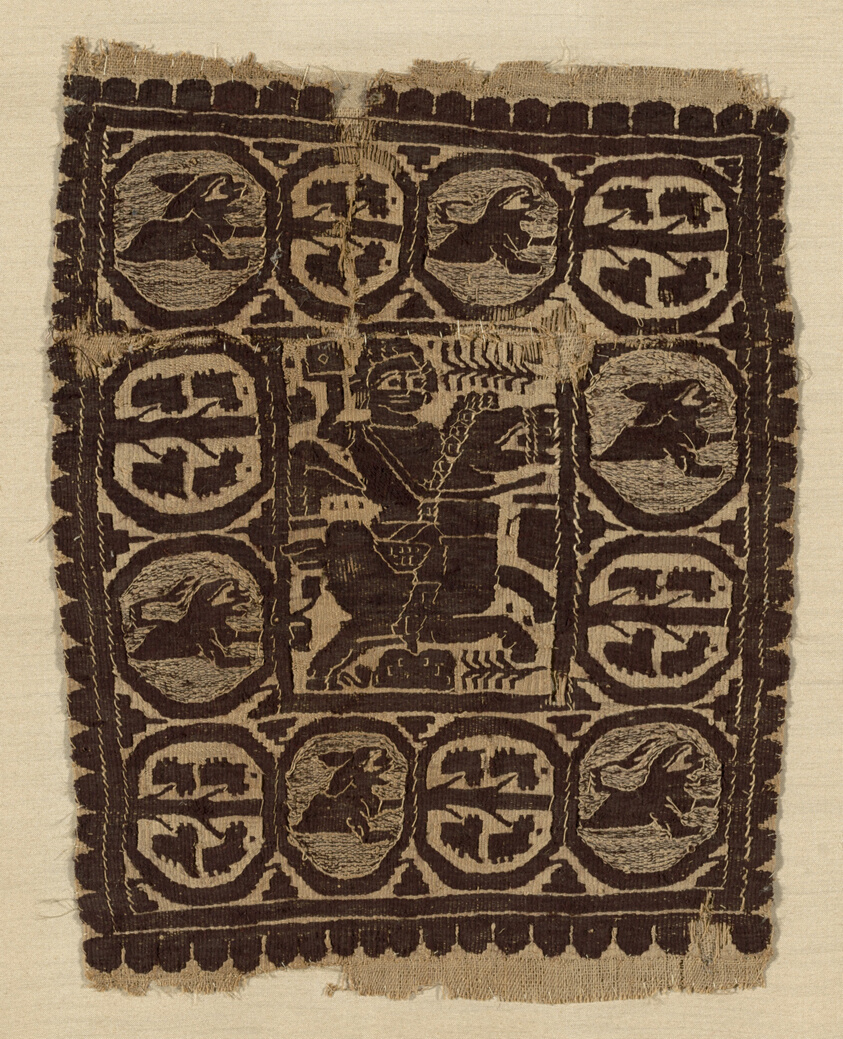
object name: Textile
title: Fragment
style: roman period (egyptian), coptic (period)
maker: Coptic; Egypt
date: Roman period (30 B.C.–641 A.D.), 4th/5th century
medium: Linen and wool, slit tapestry weave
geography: Egypt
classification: textile; weaving